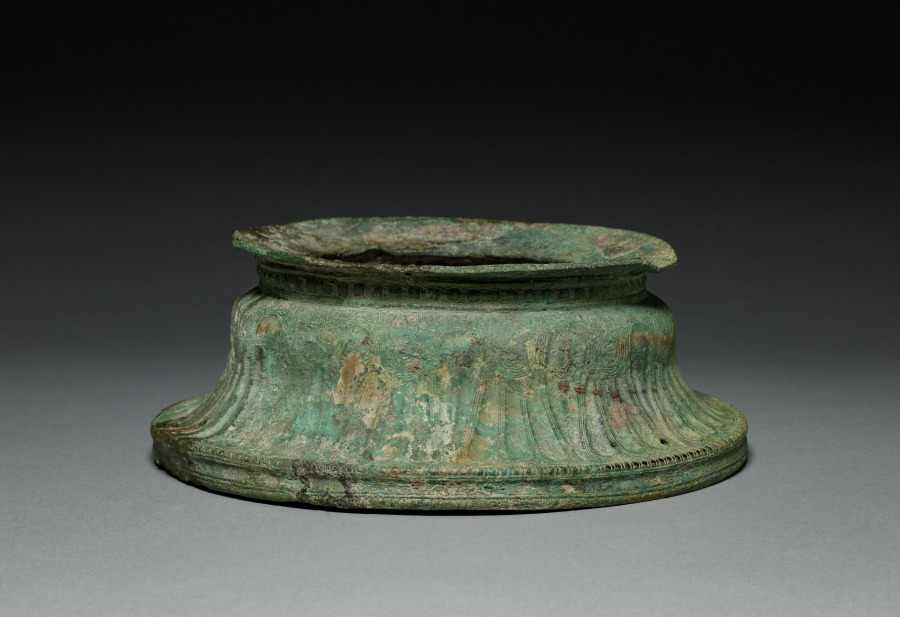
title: Bronze Volute Krater Base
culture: Greece, Laconia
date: late 600s BCE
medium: bronze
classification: Metalwork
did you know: This object supported a large vessel used for mixing wine with water called a krater.